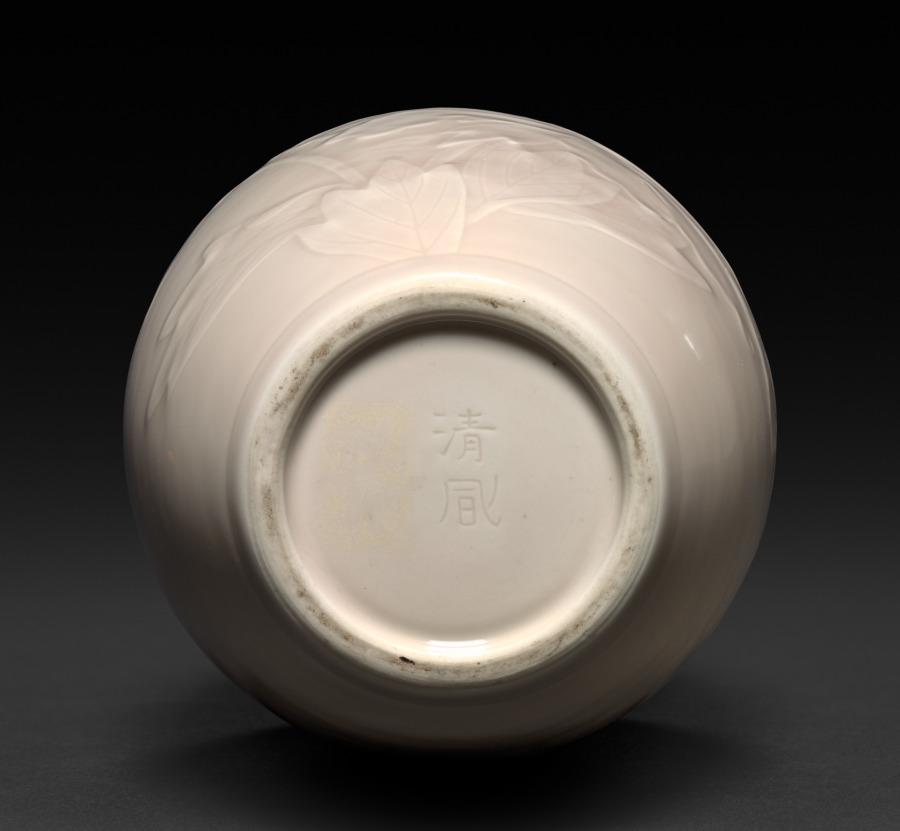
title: Vase with Peonies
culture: Japan, Meiji period (1868–1912)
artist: Seifū Yohei III (Japanese, 1851–1914)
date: 1900–1914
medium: Porcelain with molded and carved design and pink-infused cream glaze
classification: Ceramic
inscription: 清風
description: This flower vase has a creamy white glaze infused with pink. Sadly, the box has been lost, so we cannot know how it was described by the studio. However, through comparison with other works, it is possible to surmise that the work can be categorized as kanpakuji with in-glaze pink. A single huge blossom shoots up into the widest part of the vessel, near the top, so it will be visible from a distance. If this design is displayed in a space with a decorative alcove located some distance away from the entrance, even at a remove, it can announce the taste of its owner and immediately please a guest. On the other side of the vase, two butterflies, their wings overlapping, flit through the sky.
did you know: One of Seifū Yohei III’s most visually impactful techniques was to combine complex low-relief designs in clay surrounded by diffused underglaze blue or pink, which he then covered with a transparent or translucent glaze.